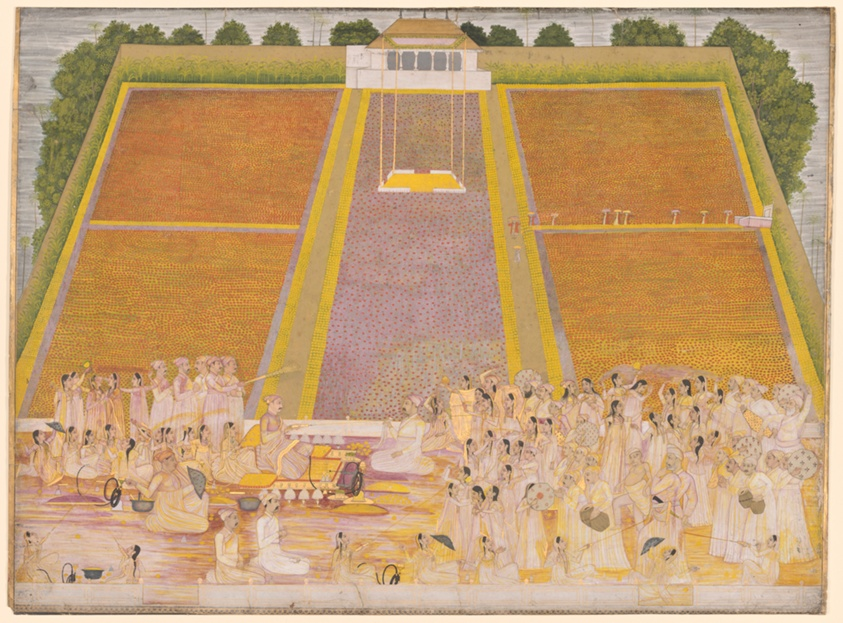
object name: Painting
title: Holi Festival in a Walled Garden with Celebrants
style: Islamic, Indian (South Asian), South Asian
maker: India; West Bengal, Murshidabad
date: c. 1764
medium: Opaque watercolor and gold on paper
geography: Murshidabad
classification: painting; watercolor; asian art